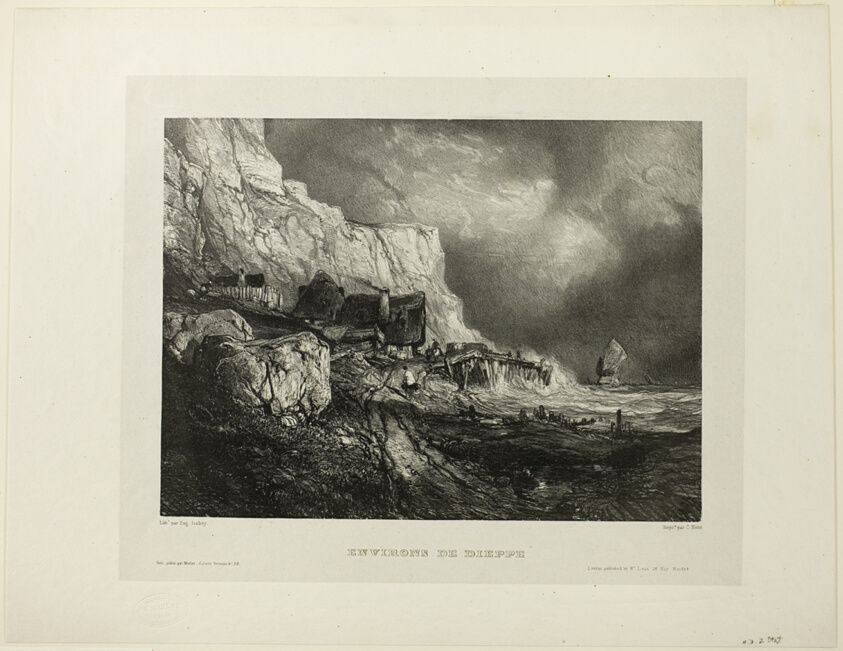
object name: Print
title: Near Dieppe, plate one from Six Marines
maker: Eugène Isabey (French, 1803-1886); printed by Charles Étienne Pierre Motte (French, 1785-1836)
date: 1833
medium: Lithograph in black on light gray China paper, laid down on ivory wove paper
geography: France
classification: lithograph; print; prints and drawing